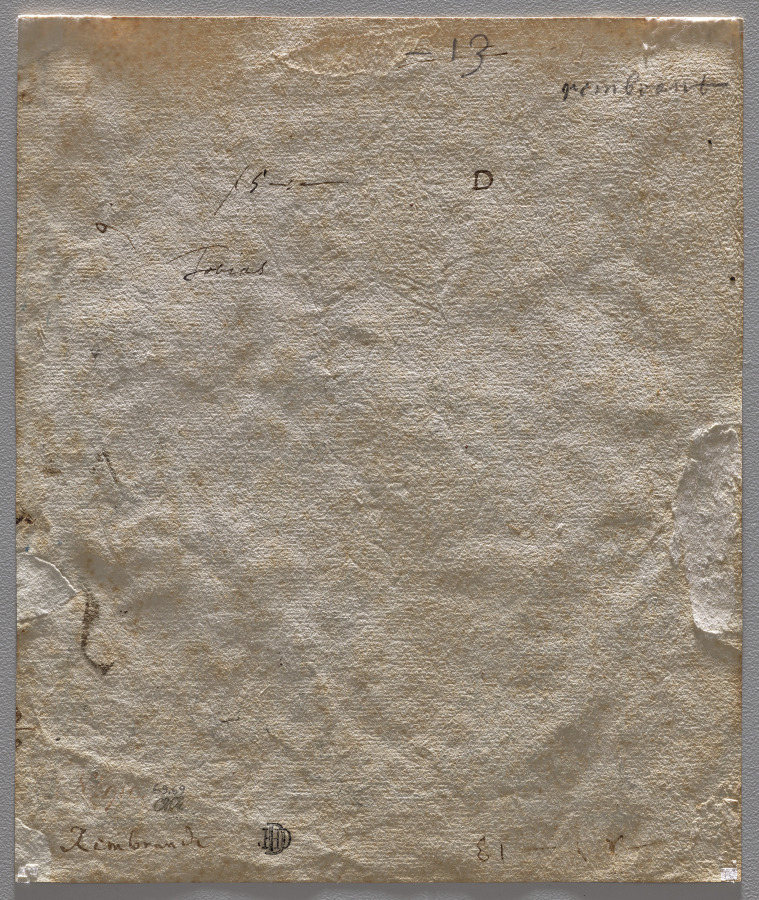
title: Tobias Healing His Father's Blindness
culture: Netherlands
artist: Rembrandt van Rijn (Dutch, 1606–1669)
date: c. 1640–45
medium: Pen and brown ink, touched with white gouache; framing lines in pen and brown ink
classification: Drawing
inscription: verso, upper center, in graphite: -13 [crossed out]; upper right, in black chalk: rembrant; upper right, in brown ink: D; upper center, in brown ink: [15-50?] / Tobias; upper left, in brown ink: 9 [sideways]; lower left, in brown ink: [illegible, cropped]; lower left, in brown ink: No 2910; lower left, in brown ink: Rembrandt; lower right, in brown ink: -d[l?]-13 [upside down]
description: This drawing is a prime example of the Dutch painter Rembrandt van Rijn's innovative approach to biblical narrative, in which he often humanized traditional pictorial formulas through the inclusion of observed details from everyday life. It depicts the climactic moment of the Book of Tobit, an apocryphal book of the Old Testament, in which, instructed by the archangel Raphael, Tobias heals his father Tobit's blindness by rubbing his eyes with fish gall. With spontaneity, a deft hand, and deceptive simplicity in his mark-making, Rembrandt depicts an intimate family scene including the archangel, Tobias, Hannah, and Sarah around a seated Tobit. Hannah’s spectacles, a unique detail among images of the scene created by Rembrandt and his circle, further thematizes sight. Rembrandt’s most innovative addition to the story centers on Tobias, who concentrates intensely to use a scalpel, rather than fish gall, to perform a cataract operation on his father’s left eye. Cataract surgery was a new procedure pioneered in Amsterdam in 1635 by Dr. Job Janszoon van Meekren, and Rembrandt may have witnessed the doctor perform it.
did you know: The seated figure in this drawing is receiving cataract surgery on his left eye, a procedure pioneered in Amsterdam in 1635 by Dr. Job Janszoon van Meekren.